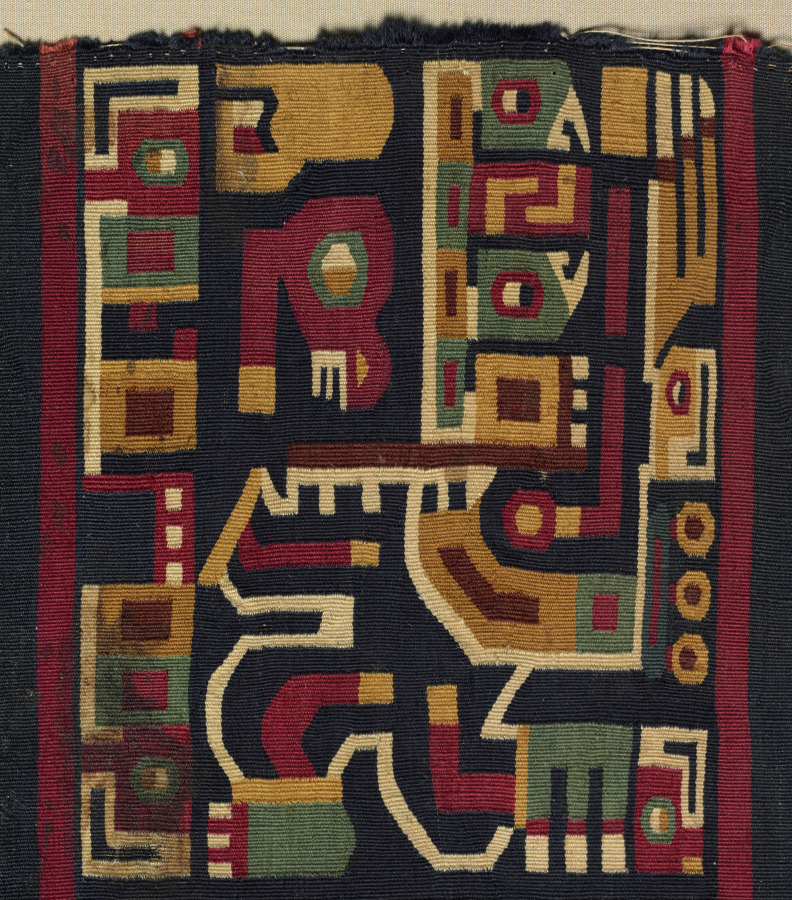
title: Half of a Sleeved Tunic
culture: Central Andes, Middle Horizon, Wari, 6th-11th century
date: c. 500–1000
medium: single-interlocked tapestry; cotton warp; camelid fiber weft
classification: Textile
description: The bird-headed creature in profile that repeats in each of this tunic's design fields gazes upward, holds a staff of authority in front of its body, and wears an ornate headdress behind which a three-feathered wing can be seen. The extremely high technical quality of such tunics suggests that the Wari reserved bird imagery for their most exalted rulers. Here, the original incorporated more than twice as much yarn as the routine--some 19 miles, all handmade and much dyed an inky, dark blue, the most prestigious of Wari colors.